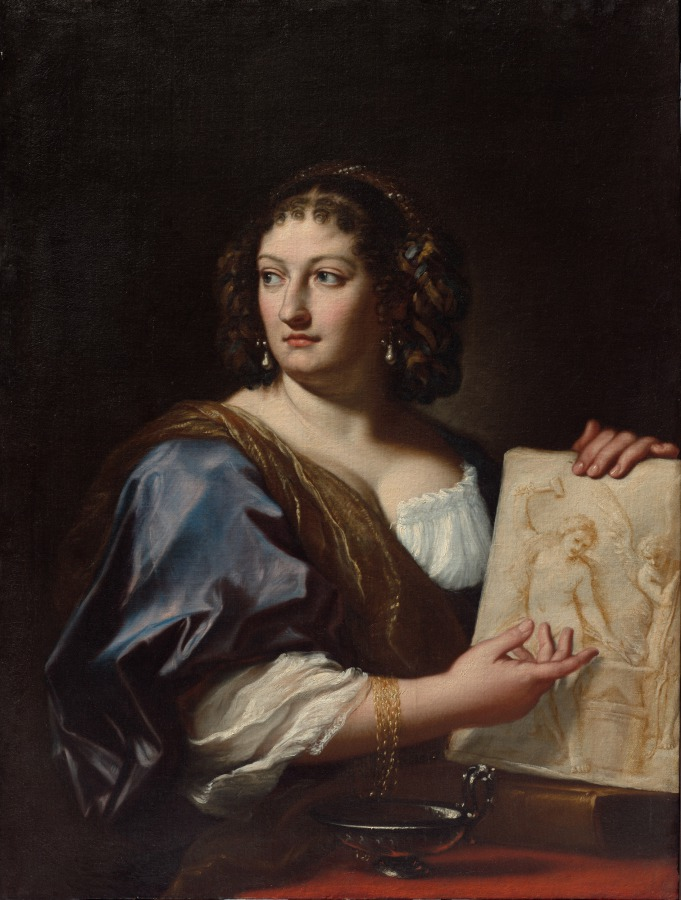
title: Portrait of Francesca Gommi Maratti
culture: Italy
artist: Carlo Maratti (Italian, 1625–1713)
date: c. 1701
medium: Oil on canvas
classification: Painting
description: In 1700 Carlo Maratti’s wife died, permitting him to marry his longtime mistress, Francesca Gommi, who began modeling for the artist in the 1670s and was the mother of his only child, Faustina. This painting was presumably painted shortly after the marriage as an homage from the artist to his new wife. To introduce an allegorical element into the composition, Maratti included a painting within a painting—in this case a drawing depicting Venus forging the love-darts of her adolescent son Cupid, suggesting that love will conquer all.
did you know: The sitter holds a drawing representing Venus making Cupid's weapons, symbolizing the power of love to conquer all.